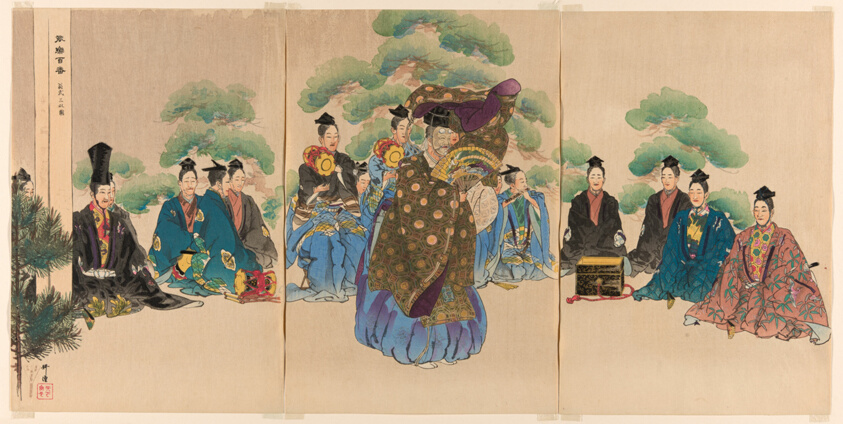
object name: Print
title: Okina, from the series "One Hundred No Dramas (Nogaku hyakuban)"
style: Japanese (culture or style)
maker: Tsukioka Kogyo; Japanese, 1869-1927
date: 1898/1903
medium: Color woodblock print; triptych oban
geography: Japan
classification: woodblock print; print; asian art